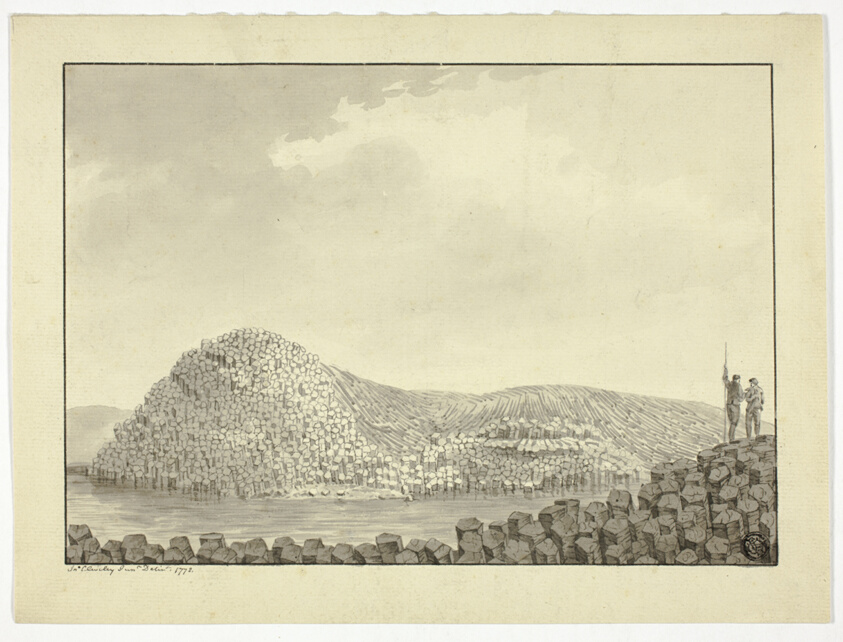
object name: Drawing and Watercolor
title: Giant's Causeway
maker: John Clevely, II (English, 1747-1786)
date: 1772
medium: Pen and black ink and brush and gray wash with graphite, on cream laid paper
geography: England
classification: ink or chalk wash; drawings (visual works); prints and drawing